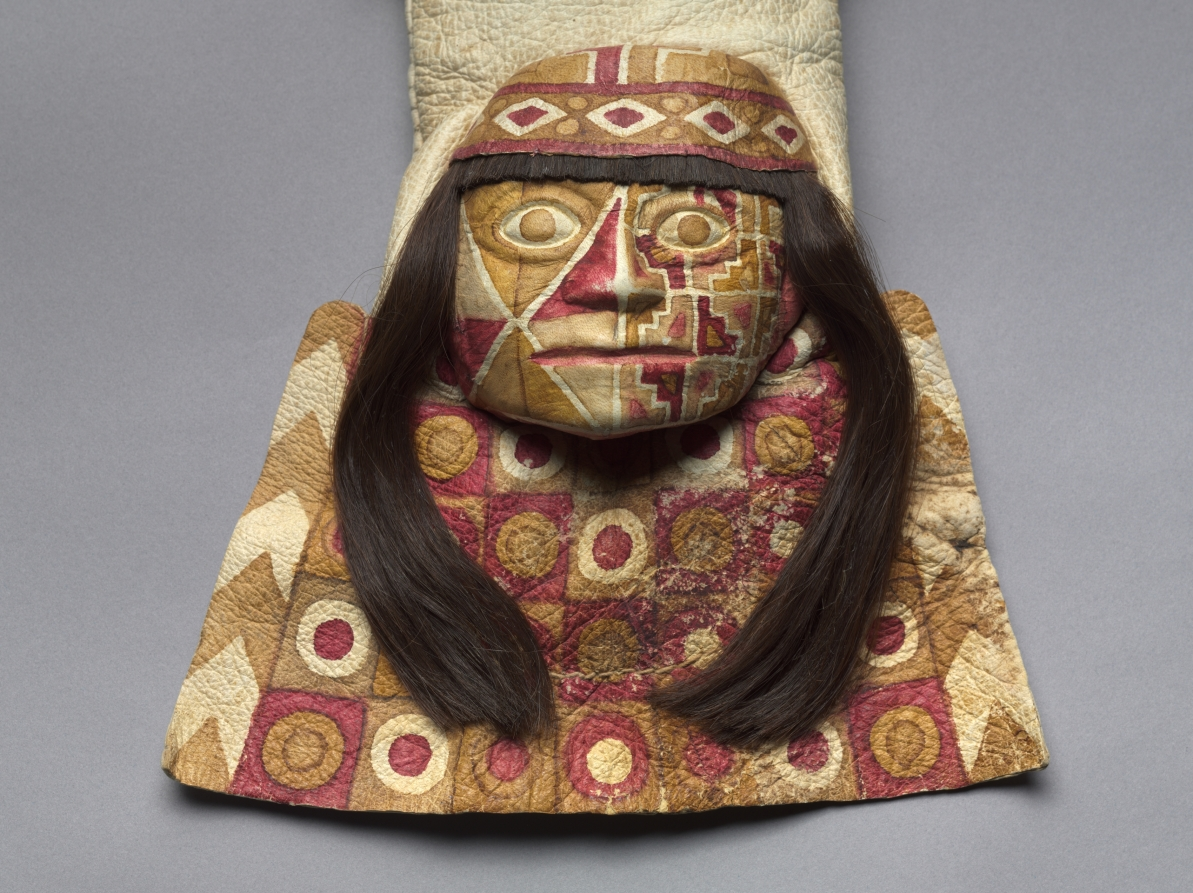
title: Bag with Human Face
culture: Andes, Wari, Middle Horizon, 6th-10th century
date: 600–1000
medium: alpaca or llama hide, human hair, pigment, cotton; coca leaf contents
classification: Mixed Media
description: The face on this bag is decorated with geometric designs that also appear on Wari warrior representations; the circles on the panel beneath the face may refer to an elite tunic made of tie-dyed cloth. The bag was used to carry coca leaves, which in the past and today have important practical and religious purposes in the Andes. Chewing the leaves during physical exertion improves stamina; when used ritually, the leaves initiate communion with cosmic forces.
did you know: This bag was used to carry coca leaves.